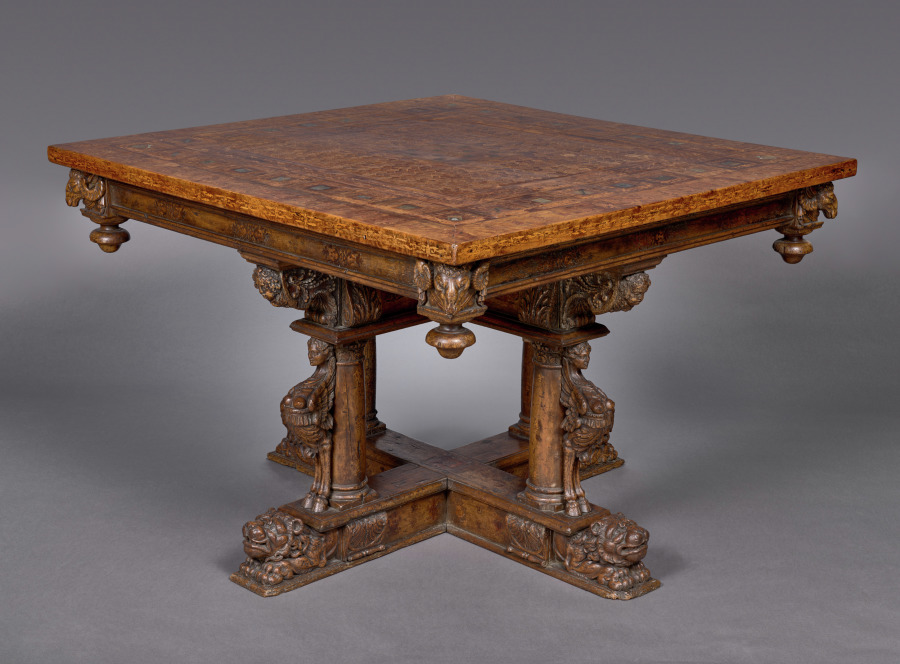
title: Inlaid Table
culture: France, Burgundian School, 16th century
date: 1550–1599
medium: walnut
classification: Furniture and woodwork